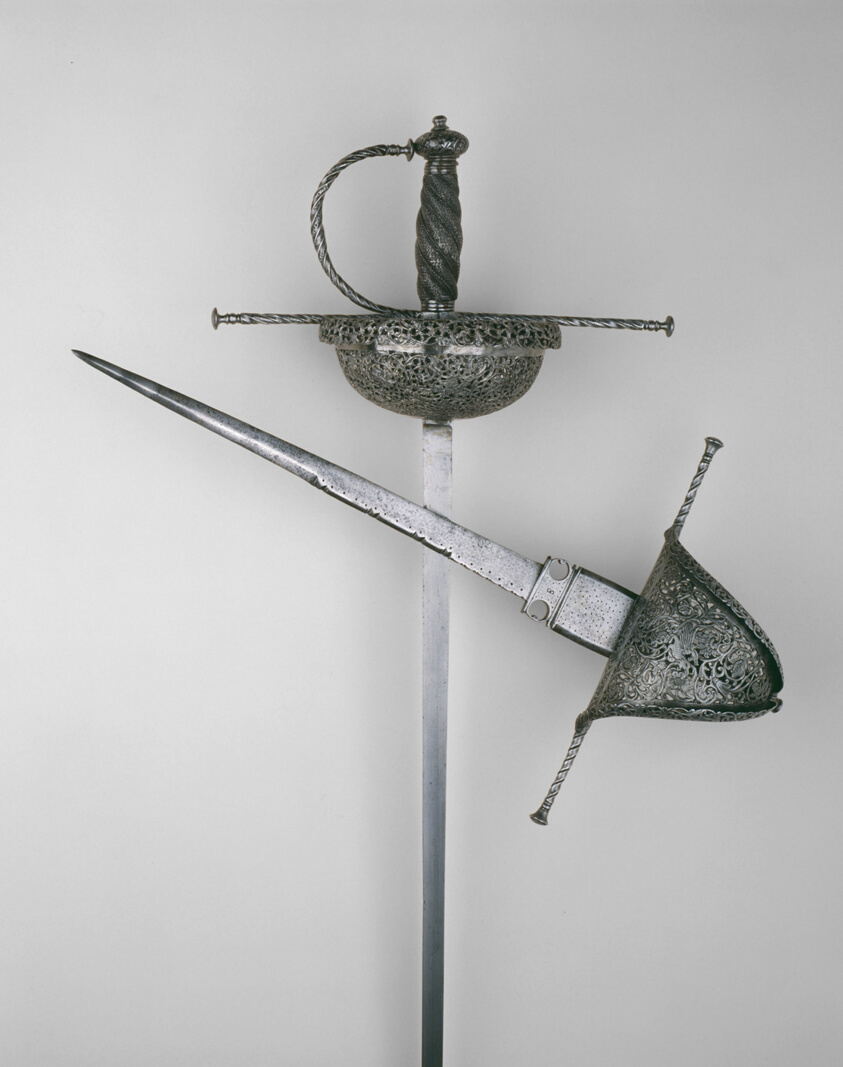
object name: Arms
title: Cup-Hilted Rapier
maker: South Italian or Spanish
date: c. 1650/60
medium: Steel, iron, and wood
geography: Italy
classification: edged weapon-sword; arms; arms and armor